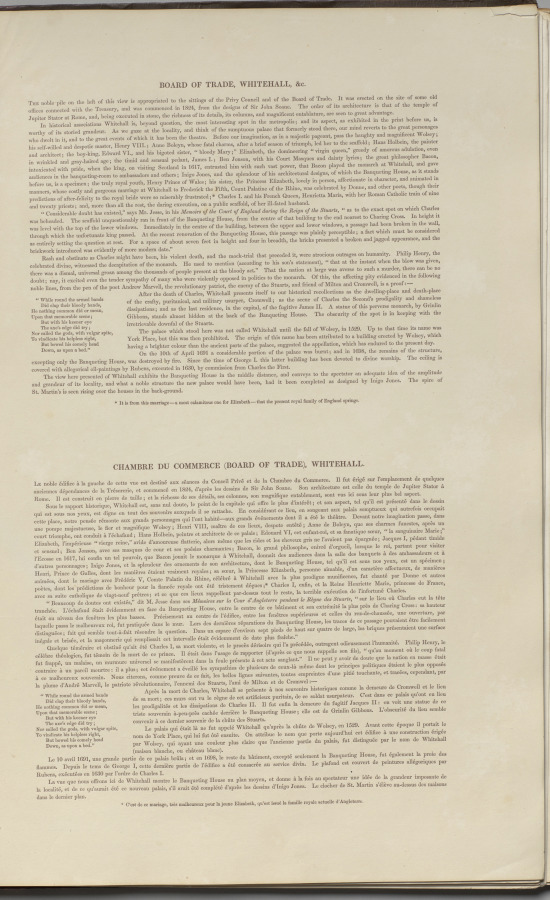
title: London As It Is: Board of Trade, Whitehall, from Downing Street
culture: England, 19th century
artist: Thomas Shotter Boys (British, 1803–1874)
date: 1842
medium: lithograph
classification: Bound Volume